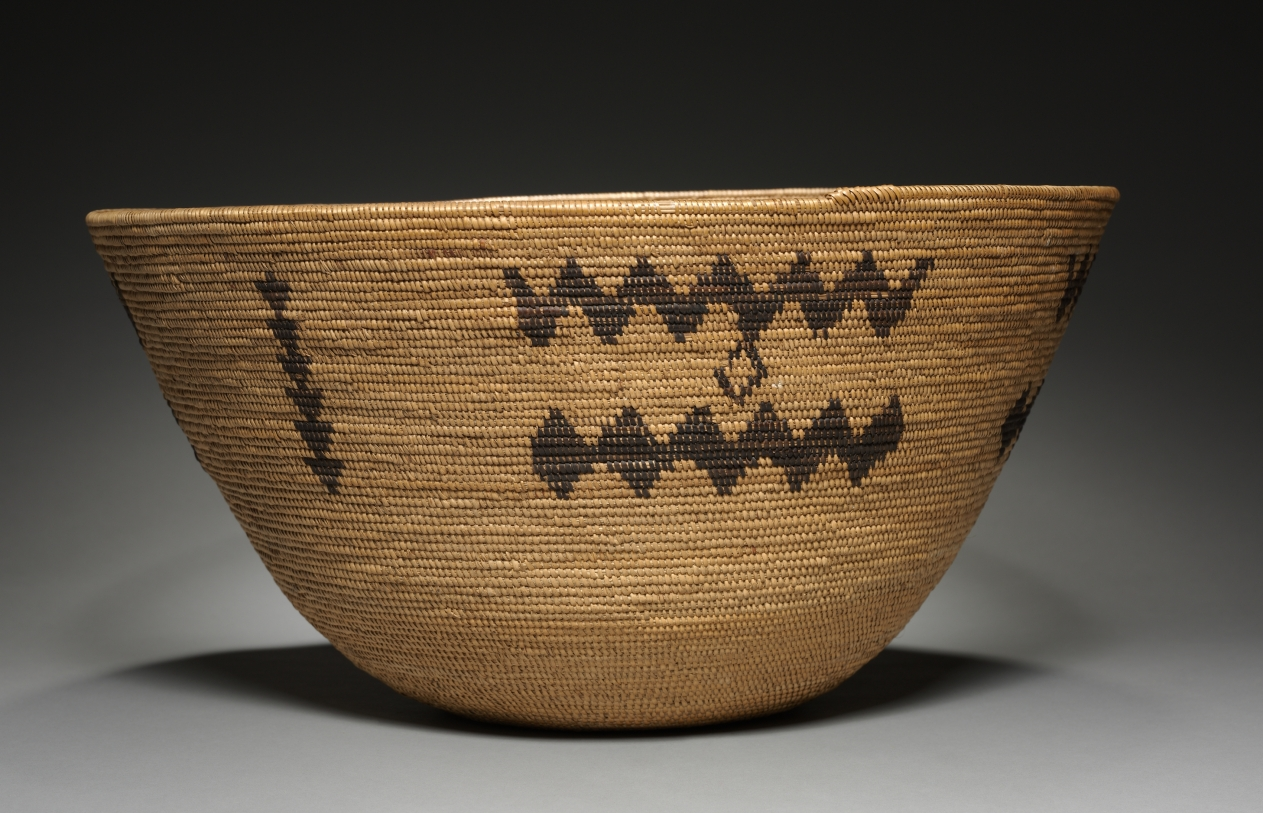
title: Food or Carrying Bowl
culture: California, Pala Band Luiseño, Pala Mission, late 19th - early 20th century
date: late 1800–early 1900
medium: coiled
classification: Basketry